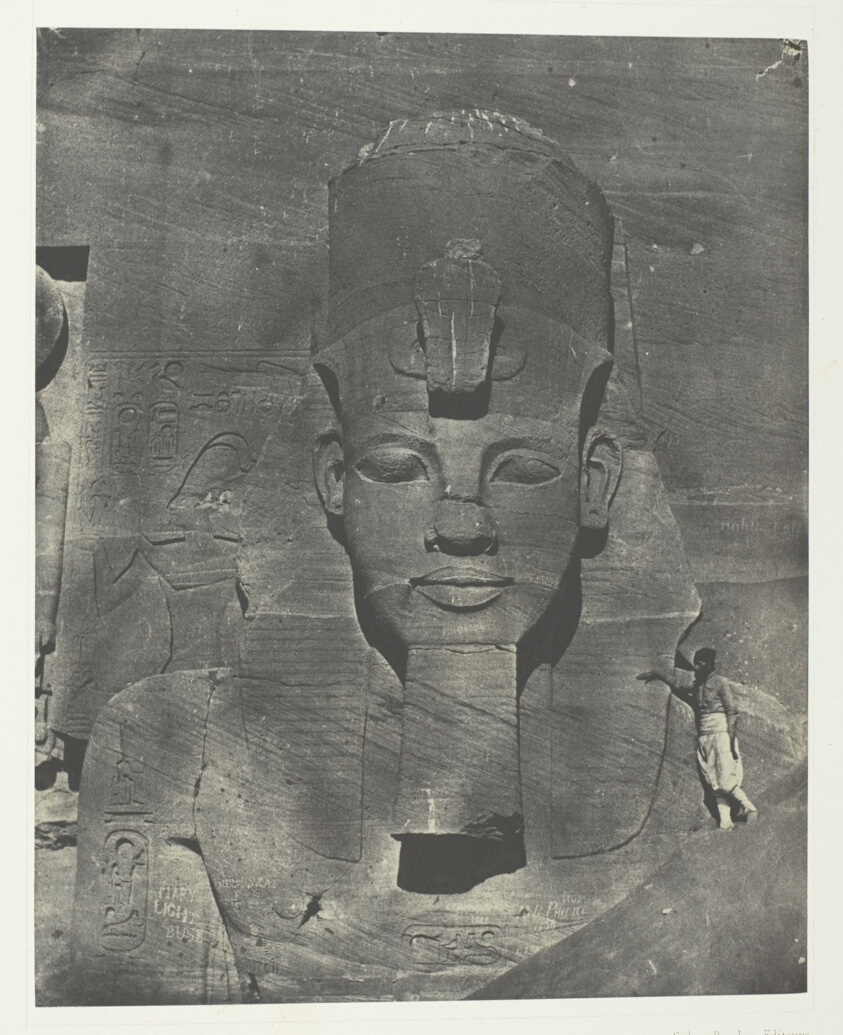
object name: Photograph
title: Ibsamboul, Colosse Médial (Enfoui) du Spéos de Phrè Nubie, Palestine et Syrie, plate 106 from the album "Egypte, Nubie, Palestine et Syrie" (1852)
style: 19th century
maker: Maxime Du Camp (French, 1822–1894)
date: 1849/51, printed 1852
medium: Salted paper print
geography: France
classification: salted paper print; photographic process; photography; photograph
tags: Collected by Hugh Edwards, Egypte, Nubie, Palestine et Syrie